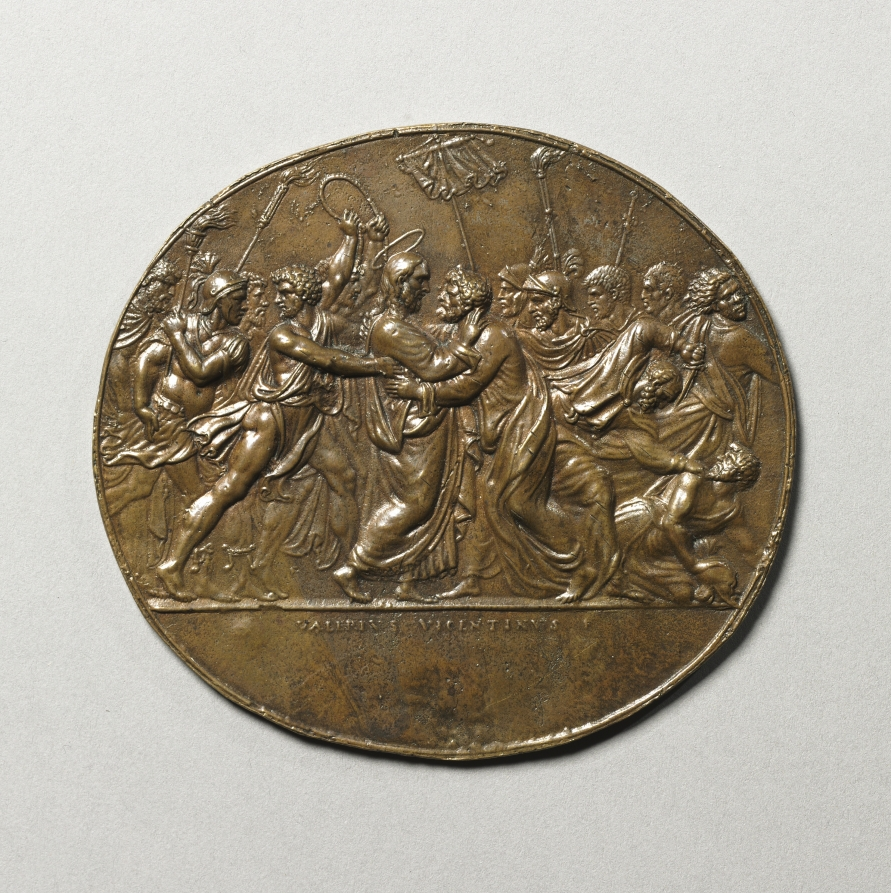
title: The Betrayal of Christ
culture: Italy, 16th century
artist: workshop of Valerio Belli (Italian, c. 1468–1546)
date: c. 1525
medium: bronze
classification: Sculpture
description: Born in Vicenza, Belli worked in Rome as a successful crystal and gem engraver, goldsmith, and medalist. His bronze plaquettes come almost without exception from crystal or hardstone carvings. This particular plaquette directly derives from a rock crystal intaglio by Belli bearing the same inscription in the Biblioteca Apostolica Vaticana, which originally was mounted with two other oval medallions of Christ Carrying the Cross and the Entombment in the silver-gilt base of a rock crystal crucifix, also in the collection of the Vatican Library. This crucifix is generally identified as the one, according to Vasari, created for Clement VII for which Belli received a payment of 1,111 gold ducats in 1525.